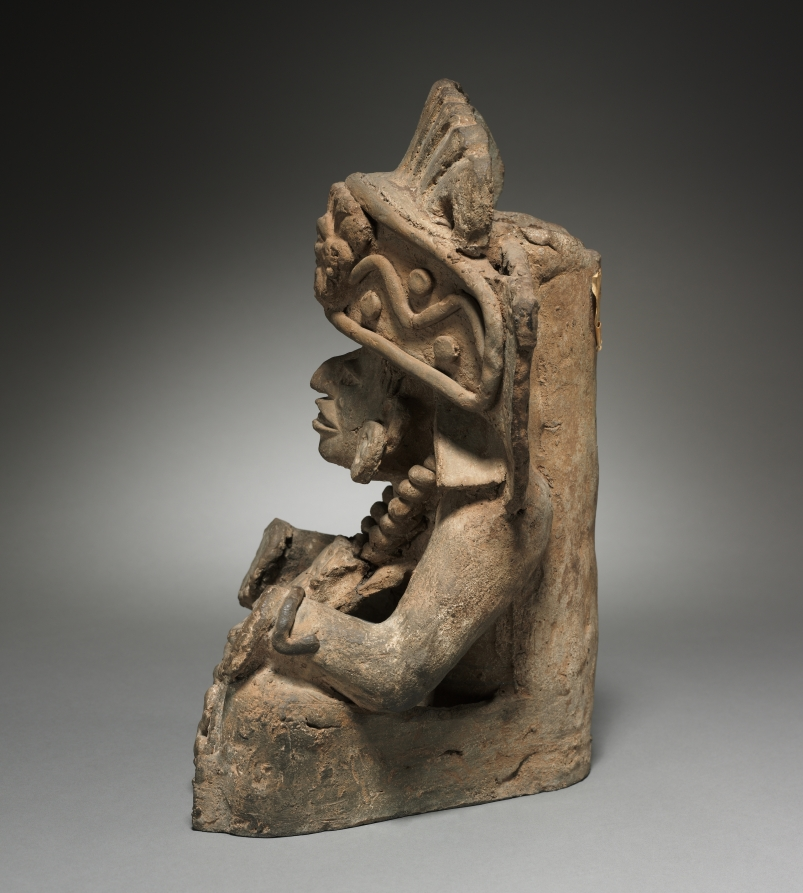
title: Funerary Urn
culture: Mexico, Oaxaca, 5th-6th Century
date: 400s-500s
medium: earthenware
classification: Sculpture